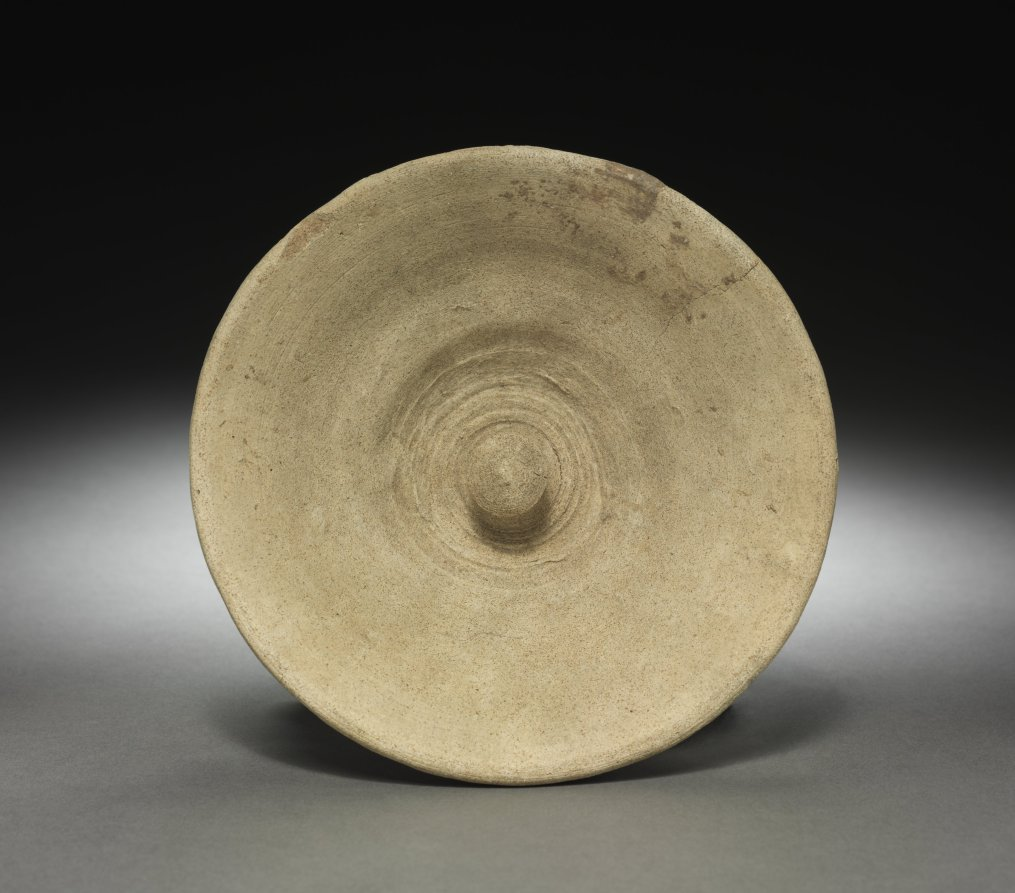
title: Bowl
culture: Iran, Sasanian Empire (224–651 CE)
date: 222–650 CE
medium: earthenware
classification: Ceramic